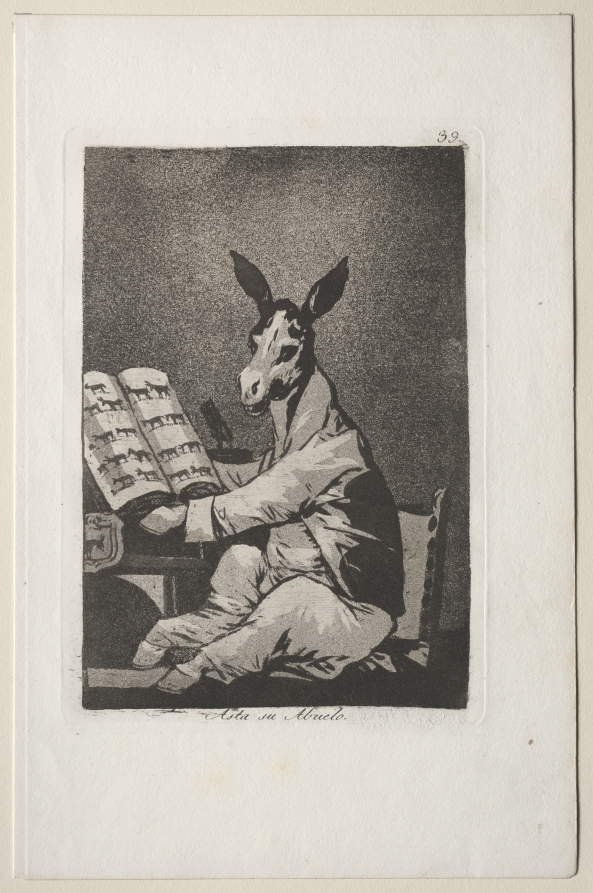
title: And So was His Grandfather, Plate 39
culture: Spain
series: Los Caprichos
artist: Francisco de Goya (Spanish, 1746–1828)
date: 1799 (printed c. 1855)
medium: etching and aquatint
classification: Print